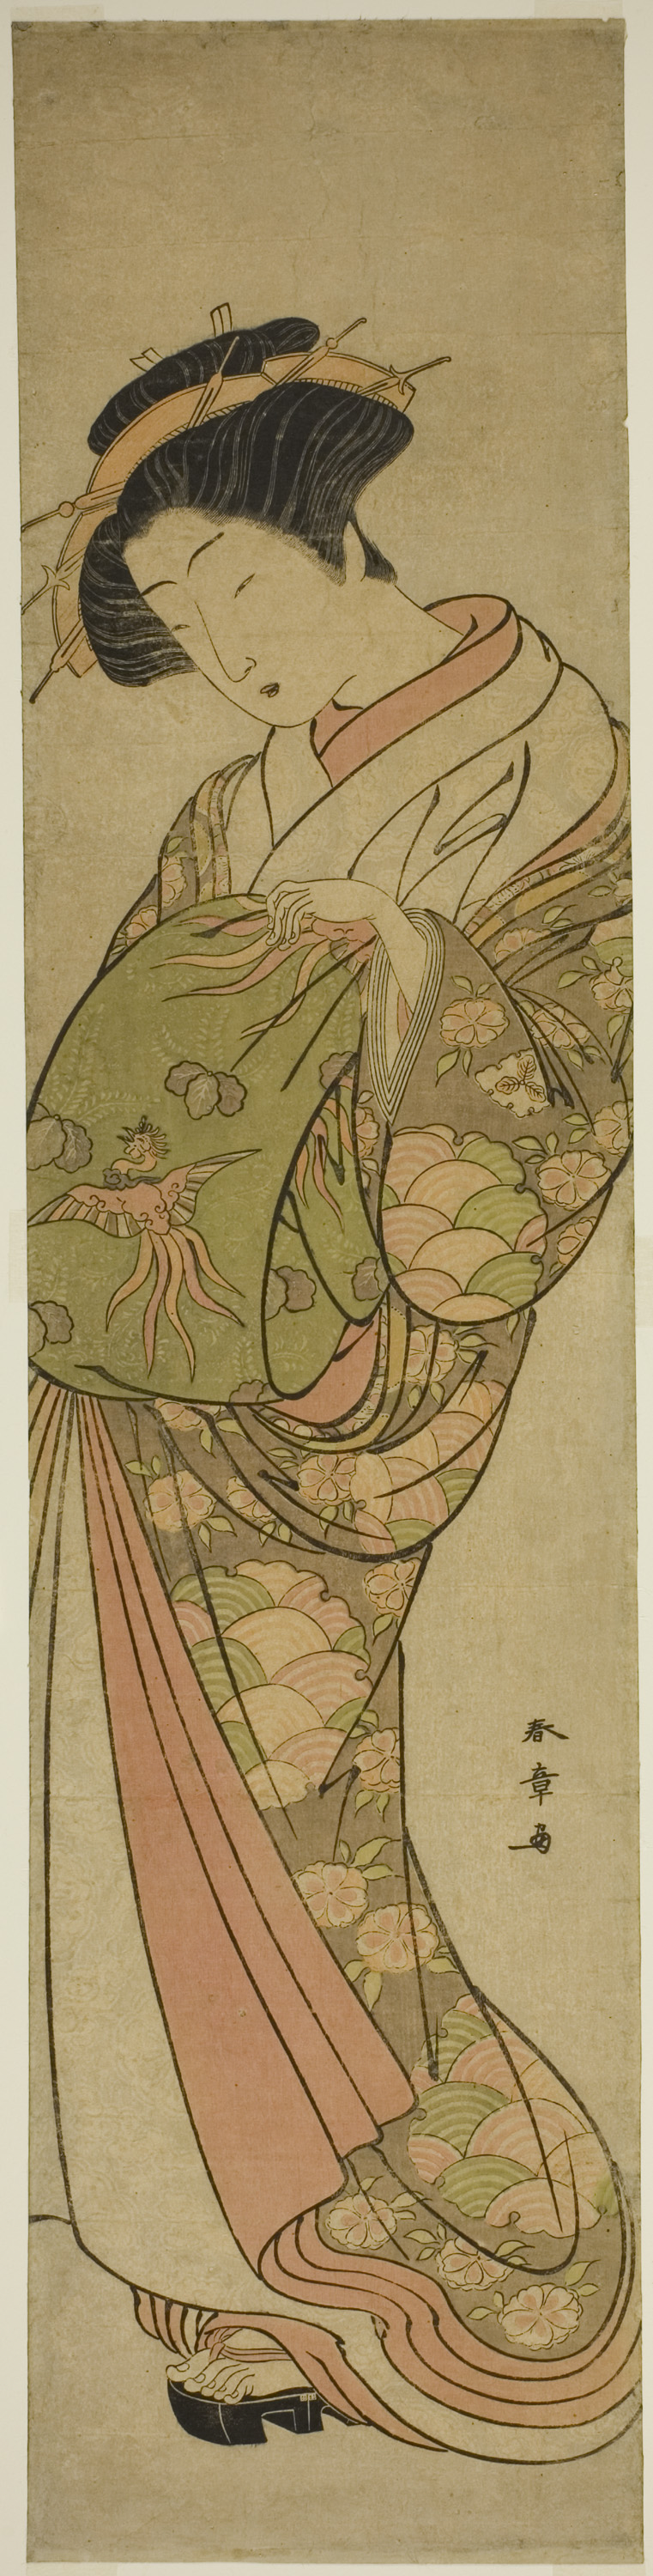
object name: Print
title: A Courtesean of the Matsubaya House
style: Japanese (culture or style)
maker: Katsukawa Shunsho 勝川 春章; Japanese, 1726-1792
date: mid–late 1770s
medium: Color woodblock print; wide hashira-e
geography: Japan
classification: woodblock print; print; asian art